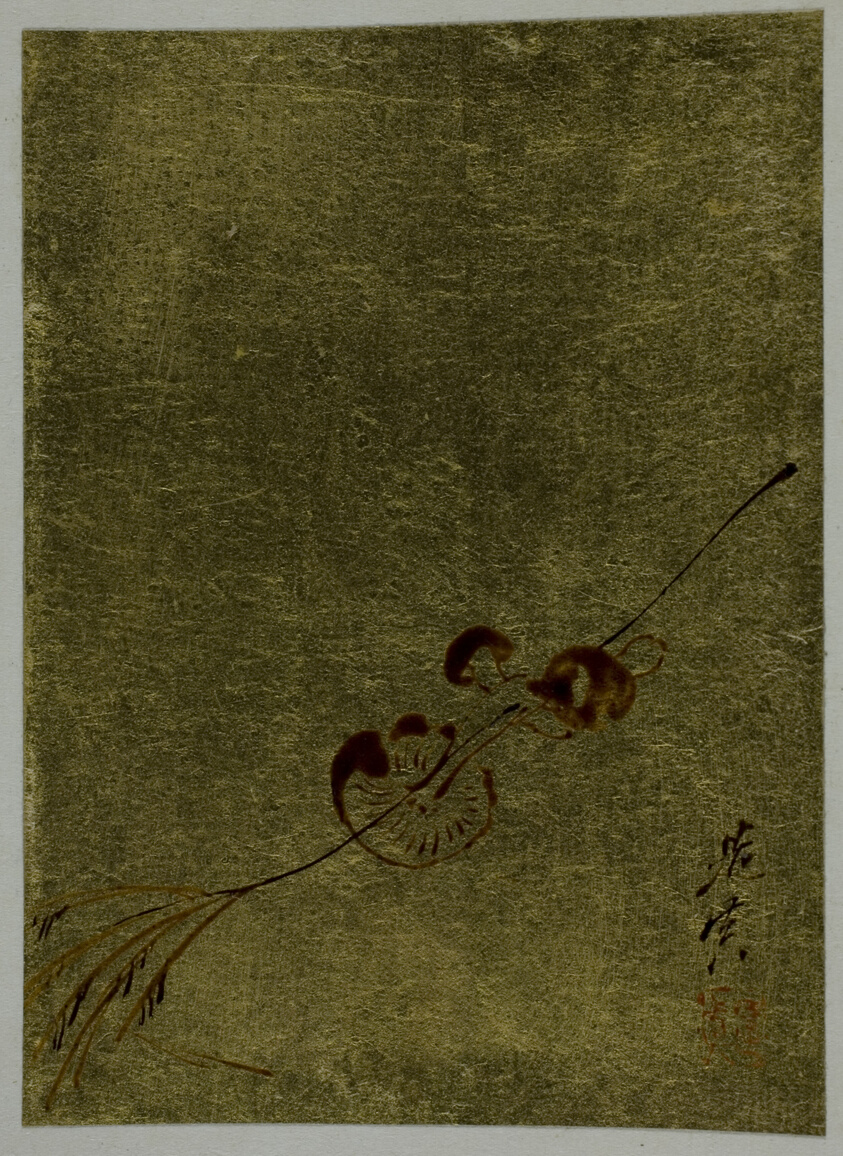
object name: Painting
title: Mushrooms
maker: Shibata Zeshin (Japanese, 1807-1891)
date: Meiji period (1868–1912)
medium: Album leaf, inks and color on paper.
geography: Japan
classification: album leaf; album/sketchbook; asian art; painting